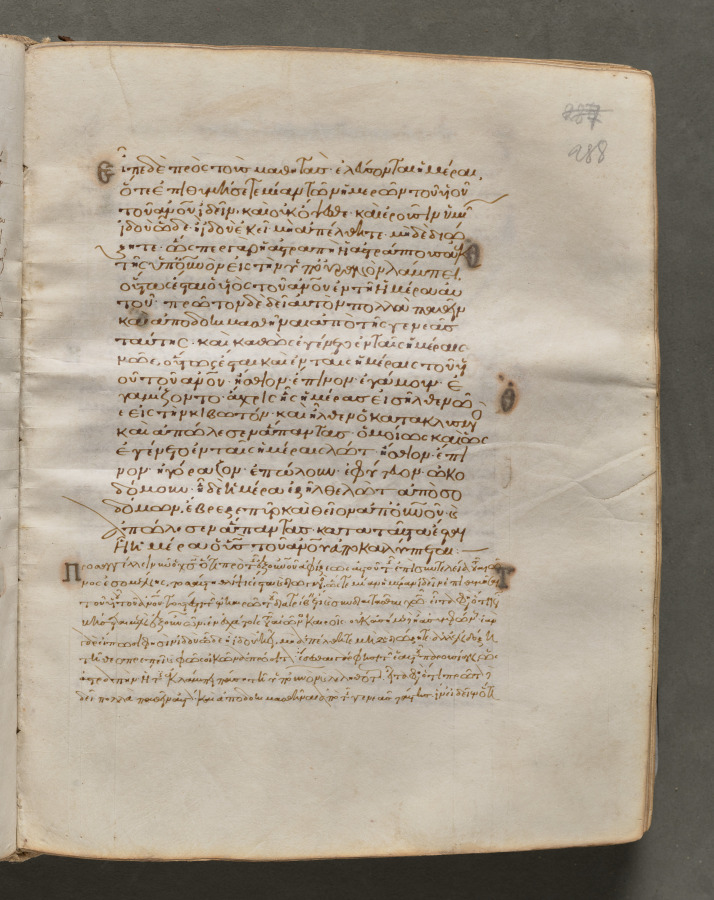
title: Text, folio 288 (recto), from a Gospel Book with Commentaries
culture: Byzantium, Constantinople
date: c. 1000–1100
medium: ink, tempera, and gold on vellum; leather binding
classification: Bound Volume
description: Each of the four gospels in this book opens on a page with brilliantly illuminated borders depicting the author of the text as well as birds—principally peacocks, symbols of the immortality of the soul—and fountains, representing the fountain of life and the salvation of the soul. This volume consists of 428 leaves with texts in Greek. Its level of sophistication suggests that it was probably written and decorated in a monastery in Constantinople.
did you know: Gospel books were carried in procession through Byzantine churches.